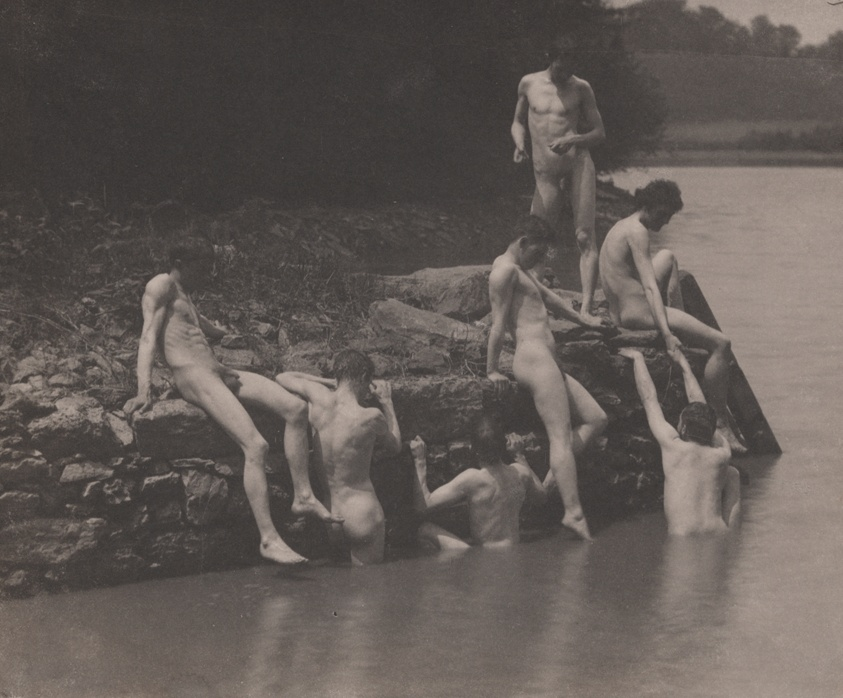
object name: Photograph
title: Study for "Swimming"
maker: Thomas Eakins (American 1844–1916)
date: July 1884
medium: Platinum print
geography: United States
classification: photography; photograph; photographic process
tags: photography, photograph